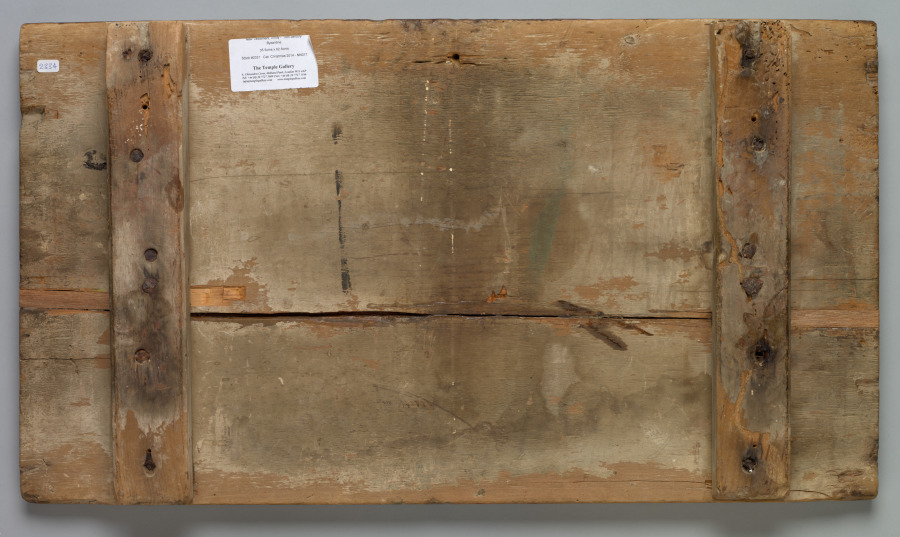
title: Icon of the New Testament Trinity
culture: Byzantium, Constantinople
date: c. 1450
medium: Tempera and gold on wood panel (poplar)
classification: Painting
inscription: Ο ΠΑΛΑΙΟC ΤΗΩ- God the Father as Christ in old age on right identified on either side of his head in gold, outlined in red.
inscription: ΤΟ ΑΙΟΝ ΠΝΑ- The Holy Spirit, identified by dove in gold outlined in red.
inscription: ΙΩCHΦ Ο ΠΟΙΗΤΗC- St. Joseph the Hymnographer identified on the left by gold letters, outlined in red.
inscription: ΚΟCΜ Ο ΠΟΙΗΤΗC- St. Kosmas the Hymnopgrapher identified on the right in gold letters in red outline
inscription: "'together with...you my God' and 'your dominion" in Scroll of Kosmas on the right.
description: This icon depicts an important subject in Orthodox Christian art, the three corresponding figures of the single godhead known as the Holy Trinity. The Trinity is represented here in a composition known as the “New Testament Trinity,” which features Christ and God the Father seated on a bench with a dove representing the Holy Spirit between them. The central field is occupied by a large wooden throne with gold highlights on which Christ (left) and the Ancient of the Days (God the Father as Christ in old age) are seated. The Holy Spirit, in the form of a dove, hovers within an eight-pointed star that signifies the eighth day, the future eon. On either side of the Trinity are two hymnographers, authors of hymns of praise, both identified by gold letters outlined in red—Saint Kosmas (about 675–752) on the left and Saint Joseph (about 812/818–about 886) on the right. They both suspend scrolls from round-arched windows. The icon likely was part of a church templon, the barrier that separated the nave from the sanctuary in an Orthodox church. It is not signed or dated; however, careful analysis of the painting’s style and technique places it in Constantinople around 1450, just prior to the city’s fall to the Ottomans in 1453. It represents a moment when Byzantine painting reached a brilliant crescendo.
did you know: More than just a breakfast food, eggs are used to make the tempera paint used in this painting.